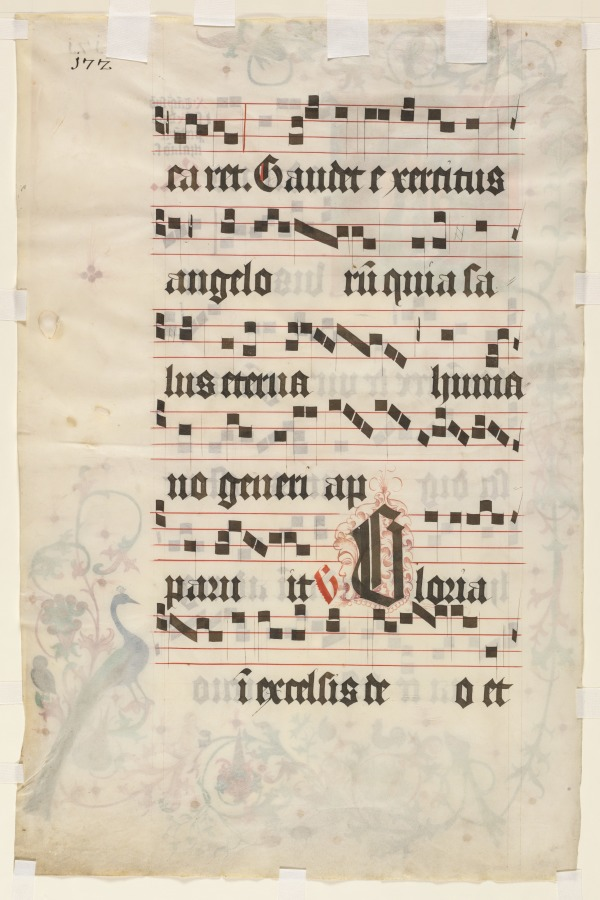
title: Leaf from an Antiphonary: Text (verso)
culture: South Germany, Augsburg (?), 15th century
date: c. 1480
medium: ink, tempera and gold on vellum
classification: Manuscript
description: The border ornament and initial design of this leaf have stylistic affinities with South German illumination of the late 1400s and particularly with the Augsburg workshops. It survives along with two known sister leaves with textual and illustrative references to Saint Clare. This saint was widely venerated during the Middle Ages and is closely associated with Saint Francis who installed her with a group of nuns in a community at Assisi. Francis prescribed an austere way of life for the nuns who became known as the Poor Clares. Saint Clare died in 1253 and was canonized in 1255. The prominent references to Clare in the parent codex to which this leaf belongs implies that it was made for a religious community of that order, perhaps in Augsburg or elsewhere in South Germany.